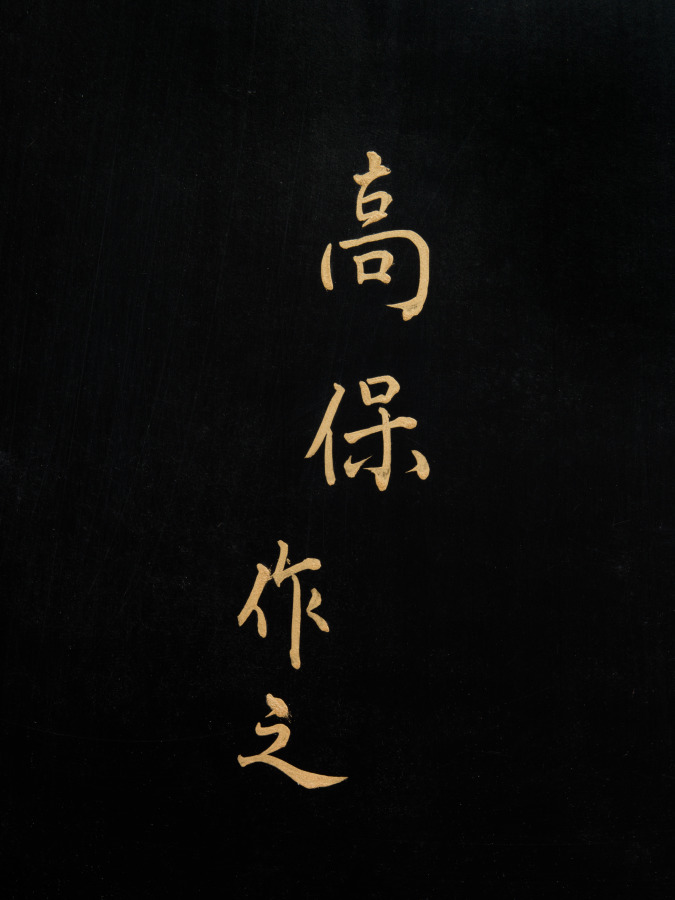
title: Writing Box (Suzuribako) with Chrysanthemum and Plum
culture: Japan, Meiji period (1868–1912)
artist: Sasaki Takayasu (Japanese, 1845–1929)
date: late 1800s-early 1900s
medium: Lacquer over wood with gold and silver sprinkled powder (maki-e)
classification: Lacquer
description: Both functional and elegant, this is a container for an ink stone, brushes, and ink from a set of writing tools that included a larger box for paper. Against a sleek gold lacquered ground, its artist has used restraint in sprinkled powder decoration (maki-e) to produce the design of cockscomb and harvested rice on the interior of the lid.